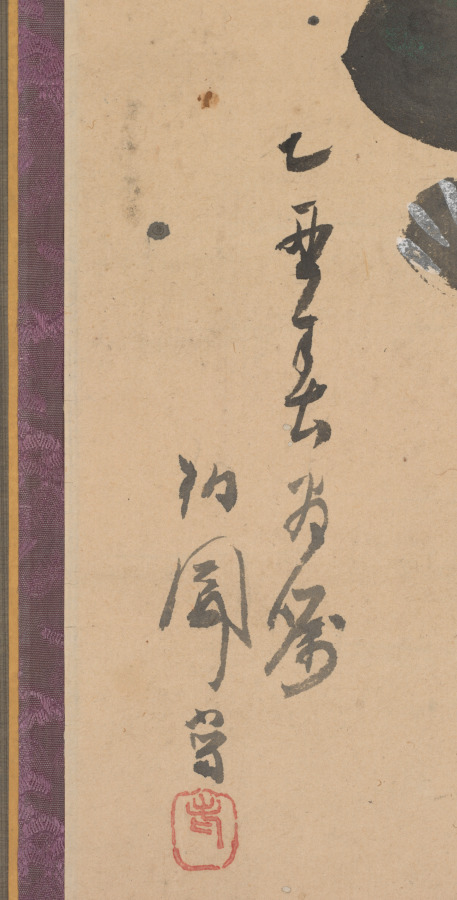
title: Ōtsu-e Nirvana of the Buddha (Ōtsu-e Butsu Nehanzu)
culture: Japan, Meiji period (1868–1912)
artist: Hakuen (Japanese, active 1850–1870)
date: 1800s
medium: hanging scroll, ink and color on paper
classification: Painting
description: The painting parodies the traditional representation of this subject. The death of Buddha is actually the moment he achieves nirvana and escapes the endless cycle of death and rebirth. Hakuen transformed this serious moment (see The Death of the Buddha [1916.1141]) into a lively parody with otsu-e subjects. Mourners surround the Buddha. An oni, who pretends to be a priest, holds his gong in the air as he beats his drums and chants prayers. The wisteria maiden appears at the left, bringing water to the mourners. Behind her is an oni in the guise of a thunder god beating his drums. The animals along the foreground represent other otsu-e characters and models. The painting would have amused 19th-century viewers familiar with the usual Buddhist imagery.